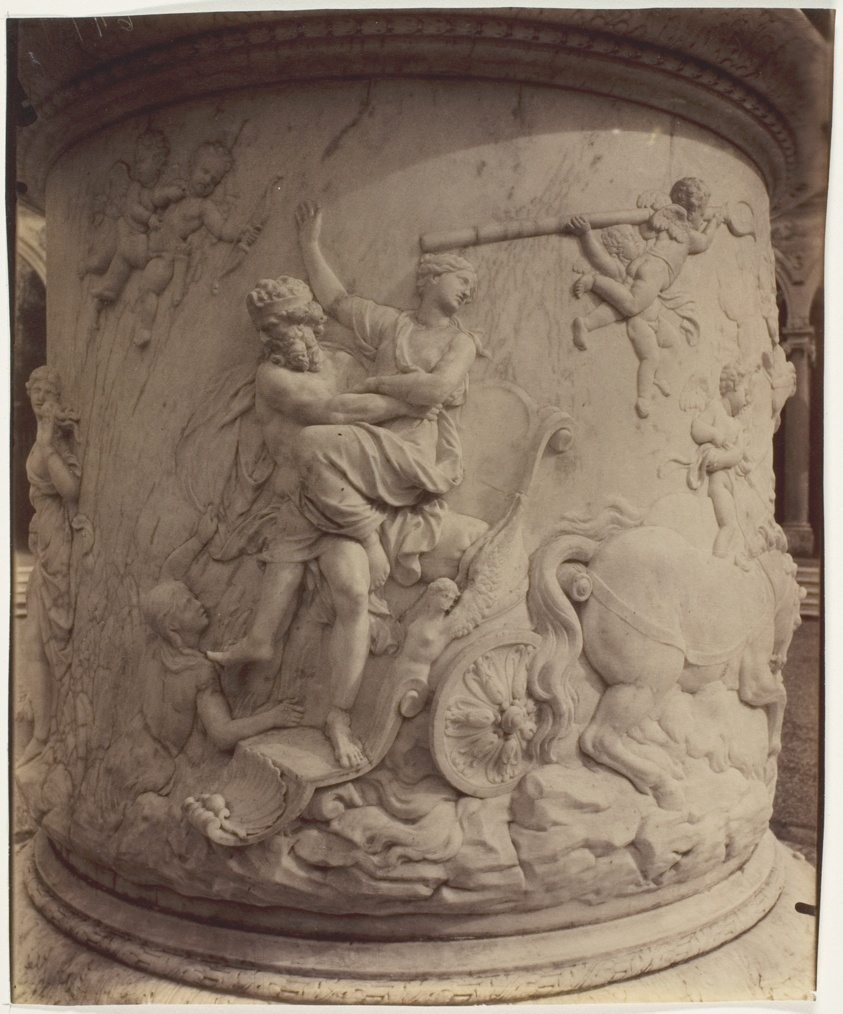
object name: Photograph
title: Versailles, Girardon, Enlevement de Proserpine par Pluton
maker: Jean-Eugène-Auguste Atget (French, 1857–1927)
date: 1904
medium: Albumen print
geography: France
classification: albumen silver print; photographic process; photography; photograph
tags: Collected by Hugh Edwards